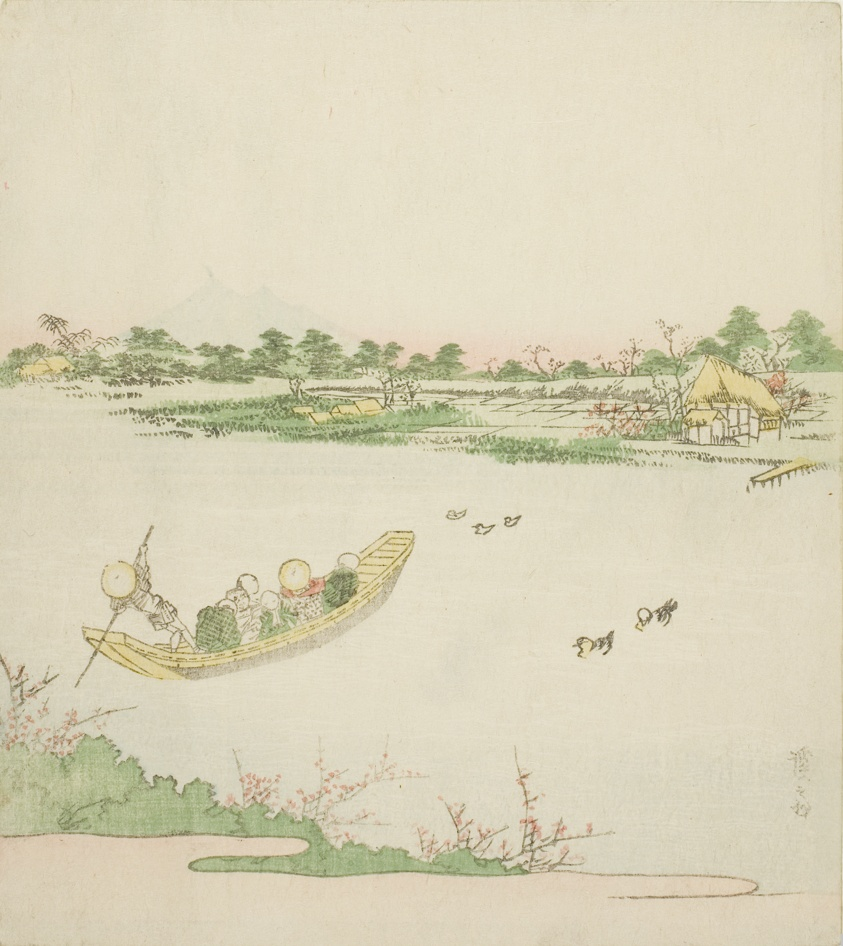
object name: Print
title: A Ferryboat Crossing the Sumida River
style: Japanese (culture or style)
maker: Keisai Eisen (Japanese, 1790-1848)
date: c. 1820s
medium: Color woodblock print; shikishiban, surimono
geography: Japan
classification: woodblock print; print; asian art